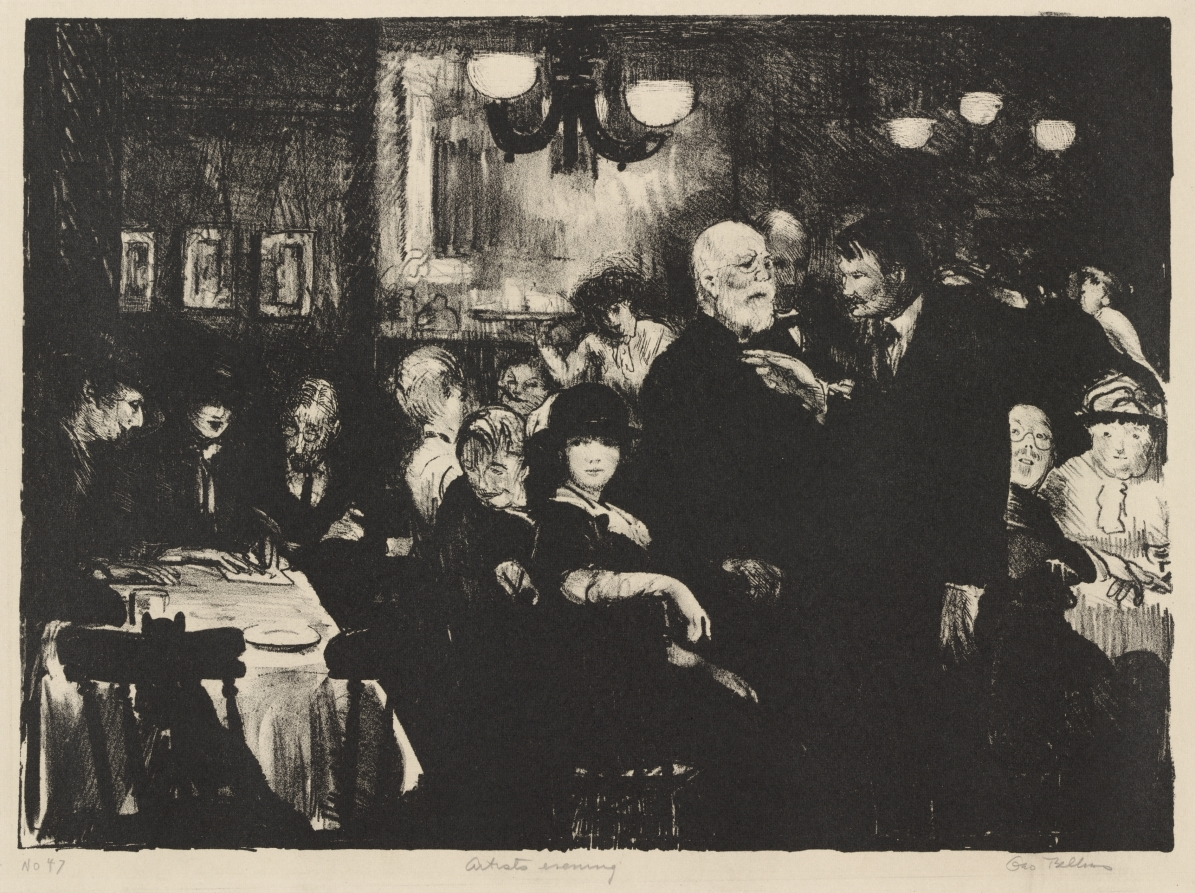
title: Artist's Evening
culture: America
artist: George Bellows (American, 1882–1925)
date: 1916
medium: lithograph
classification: Print